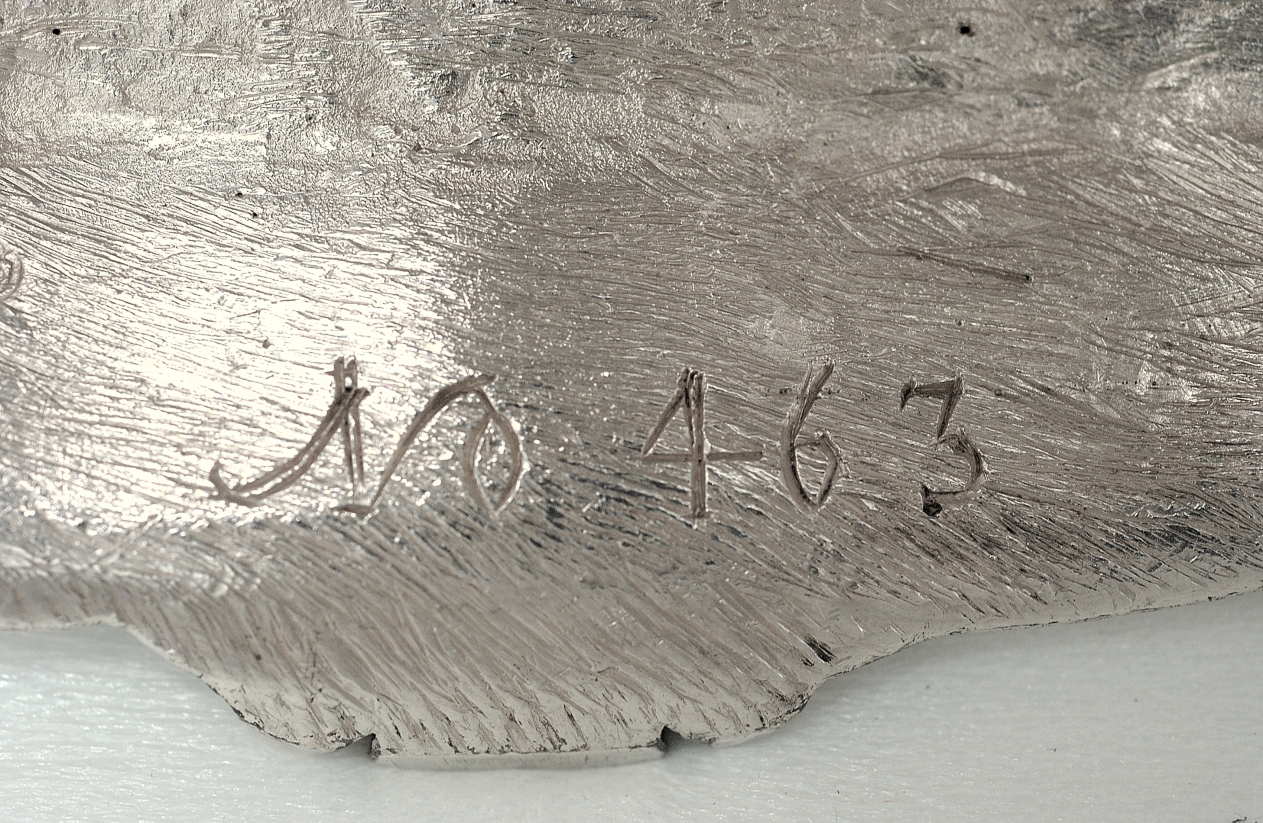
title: Candelabrum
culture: France, Paris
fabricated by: François Thomas Germain (French, 1726–1791)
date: 1757–1758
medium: silver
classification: Silver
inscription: [Maker’s mark of Francois-Thomas Germain, beneath base]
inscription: [Charge mark of Eloy Brichard, 1756−1762, beneath base]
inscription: [Warden's mark For Paris, 1757−1758, beneath base]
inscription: [Discharge mark for work intended for export, 1756−1775, beneath base]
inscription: [Discharge mark for work intended for export, 1756−1775, on base]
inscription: [Hallmarks for Saint Petersburg, on base]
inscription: [Assay mark of Ivan Frolov, on base]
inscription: [Russian standard of the French silver, on base]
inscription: [Maker’s mark of Francois-Thomas Germain, master silversmith on October 16, 1748, beneath drip pan of each three bobeches]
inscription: [Charge Mark Of Eloy Brichard, 1756−1762, beneath drip pan of each three bobeches]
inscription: [Discharge mark for work intended for export, probably 1733−1775, beneath drip pan of each three bobeches]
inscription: [Warden's mark for Paris, 1757-1758, beneath drip pan of each three bobeches]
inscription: [Russian standard of the French silver, beneath drip pan of one of three bobeches]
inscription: [Assay mark of Ivan Frolov, beneath drip pan of one of three bobeches]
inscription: [Charge mark for large work of Eloy Brichard, 1756−1762, on bayonet attachment of candelabra]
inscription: [Warden's mark for Paris, 1757-1758, on bayonet attachment of candelabra]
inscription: [Illegible mark in a square, on one bobeche]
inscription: [Engraved beneath base]: “Fait. Par. F. T. Germain. Sculp[teu]r. Orf[ev]re. Du Roy. Aux. Galleries. Du Louvre. A Paris- 1758”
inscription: [Engraved beneath base]: "Du no. 31"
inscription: [Beneath base]:"No 463"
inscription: [Russian Imperial Coat-of-arms, engraved beneath base]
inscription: [Modern inscription with black ink, beneath base]: "L5 ... 51/w-8"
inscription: [Modern inscription (illegible) in a rectangular paper label on the base, engraved. Cipher composed with two “M”’s (?) surmounted by a royal crown]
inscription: [Engraved on candelabra bayonet attachment]: "No 463"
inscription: [On candelabra bayonet attachment]: "du No 31"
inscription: [Engraved cipher with two "M"s (?) surmounted by a royal crown, on one bobeche]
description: This candelabrum is part of a pair. Its design blurs the line between function and decoration. The arms twist and curve, visually flower stems while physically supporting the candles. Though this visual unity is typical of the rococo style, the influence of the rising neoclassical style is evident in the allegorical scenes of light that decorate each candelabra’s stem.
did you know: These candelabra are part of a dinner service sent from Paris, France to Saint-Petersburg, Russia in two separate shipments, the first of which contained 270 objects for 8 dozen place settings.